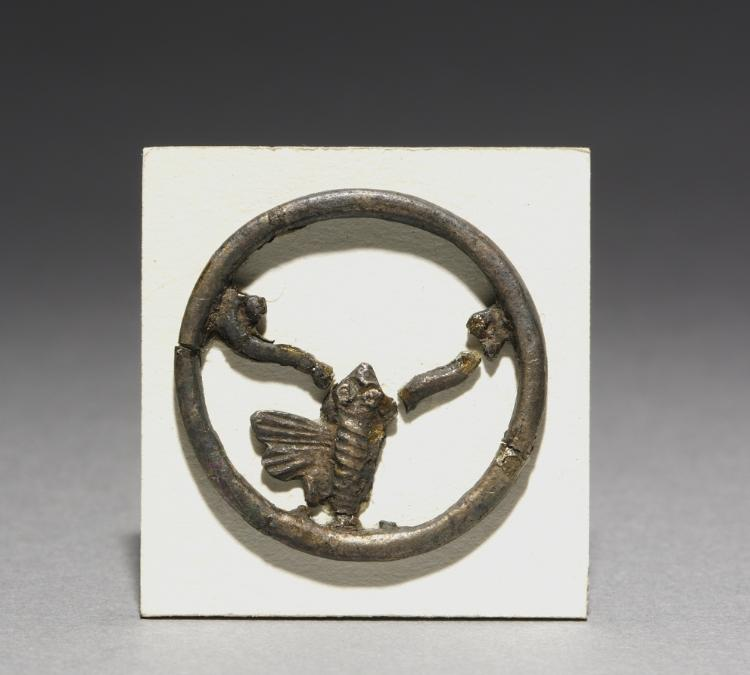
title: Ornament with Bat Design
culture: Korea, Goryeo dynasty (918–1392)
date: 1200s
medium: bronze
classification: Metalwork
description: Metallurgy advanced remarkably in the Goryeo period (918-1392), explaining why a large quantity of sophisticated artifacts with delicate designs were used not only as daily accessories but also as burial goods. A small trace of fibers found on the back of this type of metal ornament suggests that it might have been used as a brooch or pin to hold clothes together.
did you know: This metal ornament is part of a decorative brooch once used to hold clothes together.